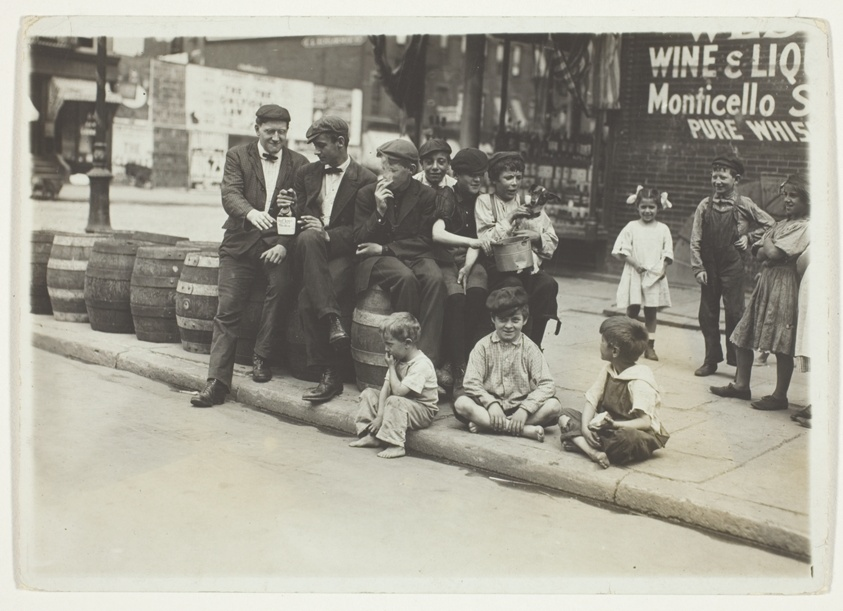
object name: Photograph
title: Untitled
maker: Lewis Wickes Hine (American, 1874–1940)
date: c. 1910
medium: Gelatin silver print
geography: United States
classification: gelatin silver (developing-out-paper) pr; photographic process; photography; photograph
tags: Collected by Hugh Edwards